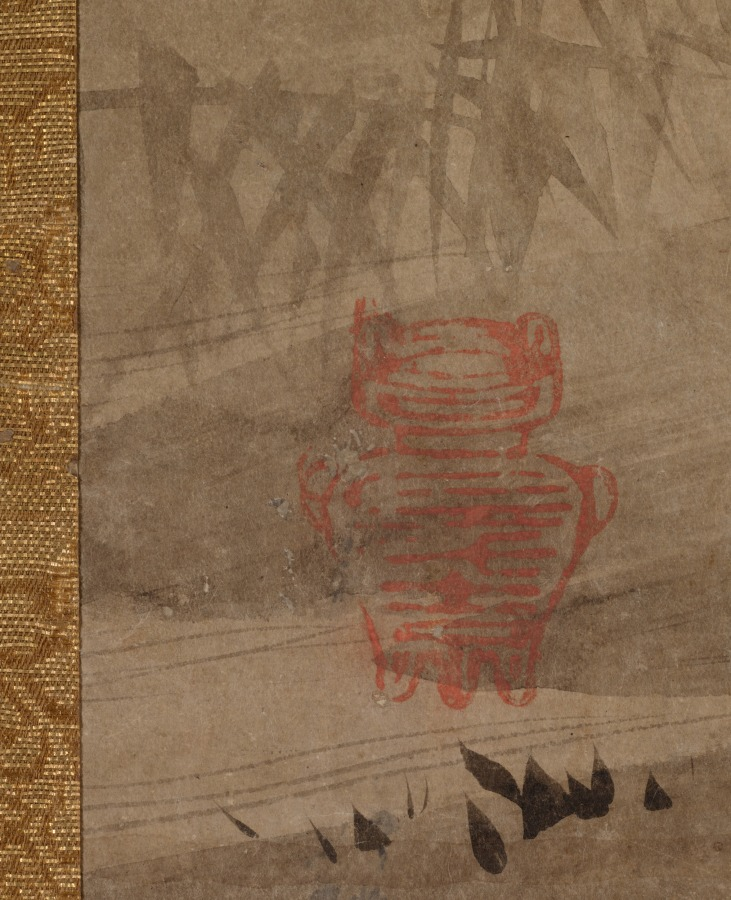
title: Wild Geese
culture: Japan, Muromachi period (1392–1573)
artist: Chōkichi (Japanese)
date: early 1500s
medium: hanging scroll; ink on paper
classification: Painting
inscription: Gourd-shaped seal of Chokichi at lower left